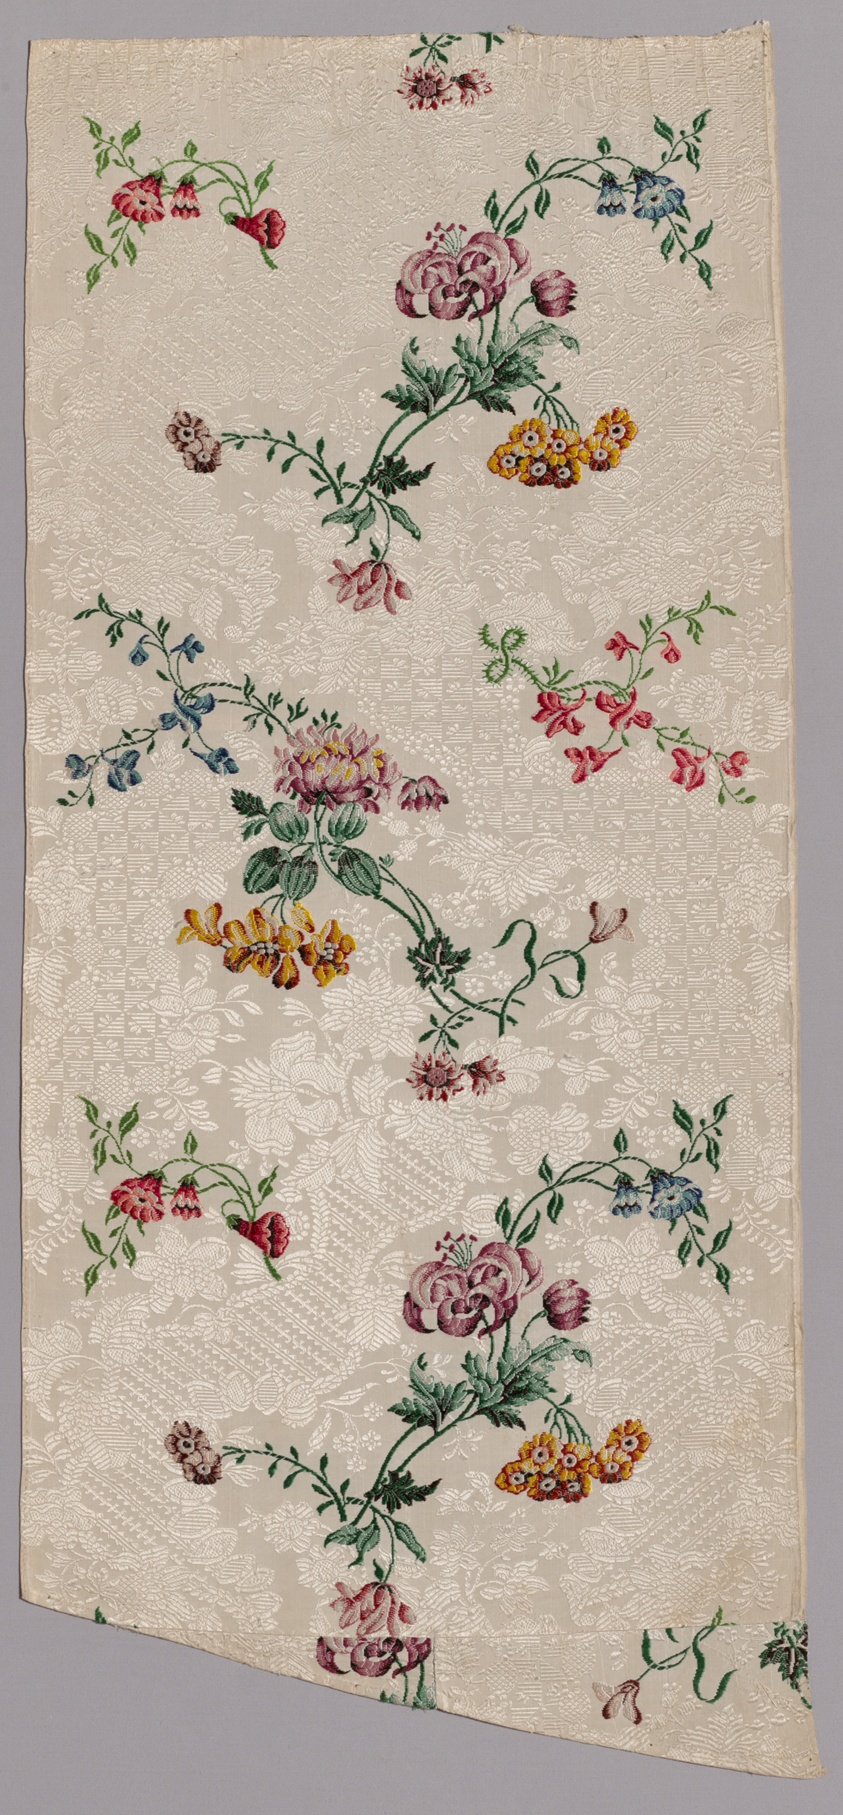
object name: Costume and Accessories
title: Skirt Panel for a Woman's Sack Gown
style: 18th Century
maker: Designed by Anna Maria Garthwaite (English, 1690–1763); Woven by Daniel Vautier (English, active 1741–51); Spitalfields, England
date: Design March 1, 1749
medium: Silk, plain weave foundation with supplementary patterning warps and supplementary brocading wefts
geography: England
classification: garment; weaving; textile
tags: flowers, foliage, floral motifs, vines, botanical/floral